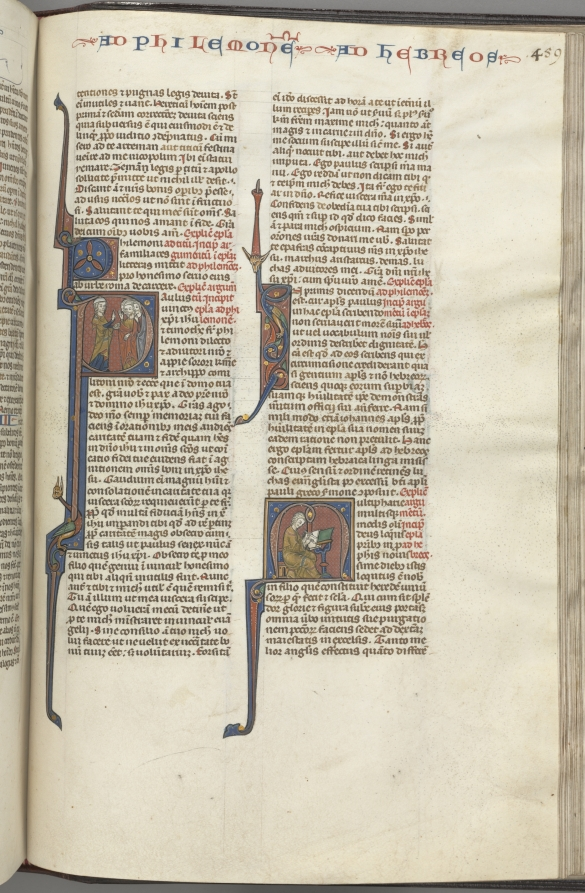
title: Fol. 459r, Philemon, historiated initial P, Paul addressing three men and Hebrews, historiated initial M, Paul seated at a desk, writing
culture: Southern France, Toulouse(?), 13th century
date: c. 1275–1300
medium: ink, tempera, and gold on vellum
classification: Bound Volume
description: Biblical manuscripts were highly prized and important possessions of churches, monasteries, cathedral schools, and universities throughout medieval Europe. The biblical texts were known as the vulgate, the translations made by Saint Jerome in the fourth century from Hebrew and Greek into Latin, which became the definitive and official Latin version of the Roman Church. In the 13th century, the bible was, for the first time, produced as a single volume with an officially sanctioned sequence to its books and chapters as illustrated by this example. The very extensive decoration of this bible is arranged hierarchically to indicate the relative importance of the various texts so that full or almost full-page initials mark the openings of the first prologue, Genesis, and the first Gospel; historiated initials mark the beginning of each book and illuminated initials mark the Prologues.